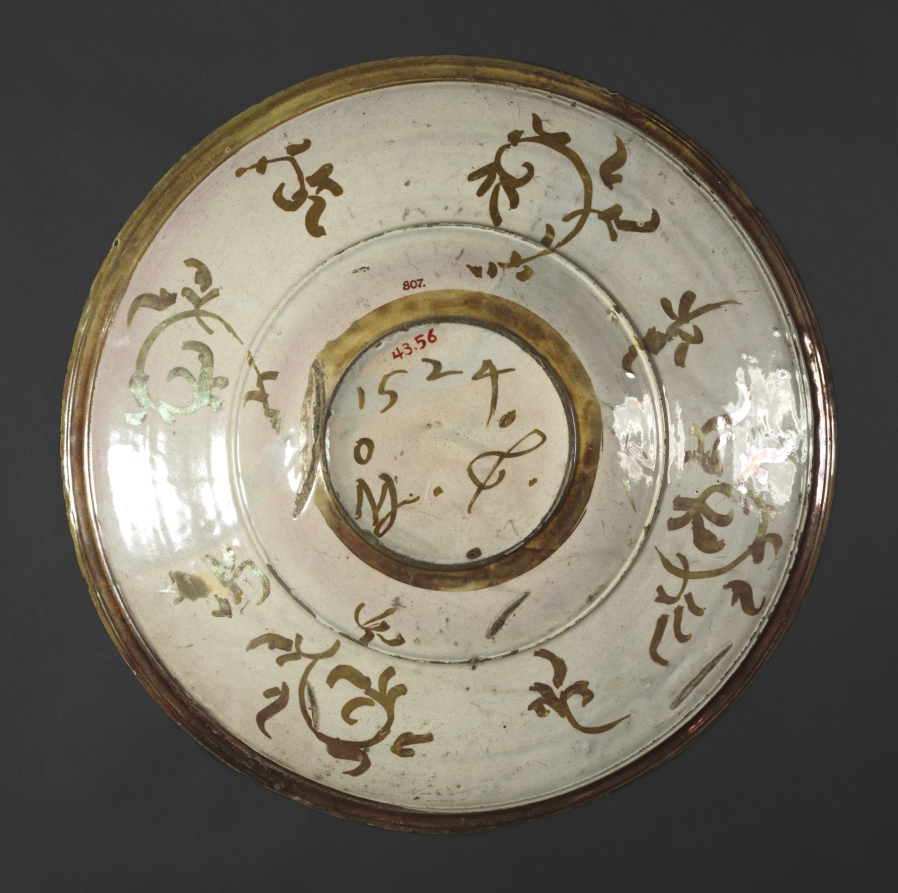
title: Charger with Arms of the Vigeri Family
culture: Italy, Urbino region, Gubbio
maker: circle of Maestro Giorgio Andreoli (Italian, 1465?–1553)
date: 1524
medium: tin-glazed earthenware with gold and red lustre (maiolica)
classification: Ceramic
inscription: written in a panel along the outer edge: "W" or "M"; written on the foot: "1524" and "Mo Go" [mark of Maestro Giorgio].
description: Italian nobles of the 1500s often expressed their wealth, social status, and sophistication by ordering large sets of maiolica that sometimes carried their coats of arms or even likenesses, usually in profile similar to portrait paintings of the period. Reserved for use at festival events such as a wedding or commissioned to mark a special occasion or an important visit, elaborately decorated utilitarian vessels in maiolica were prized as works of art by their owners and displayed as such in their residences.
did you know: During the Renaissance, the powerful Vigeri family of Savona, a seaport in northwestern Italy, included numerous cardinals and bishops of the Roman Catholic Church.